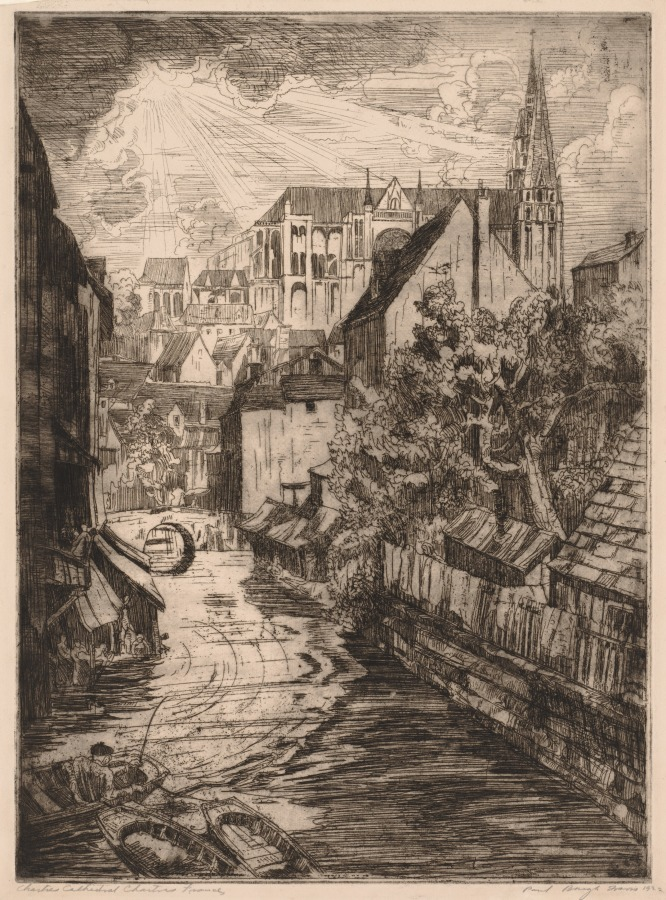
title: Chartres Cathedral, Chartres, France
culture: America, Ohio, Cleveland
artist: Paul B. Travis (American, 1891–1975)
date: 1922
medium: etching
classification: Print